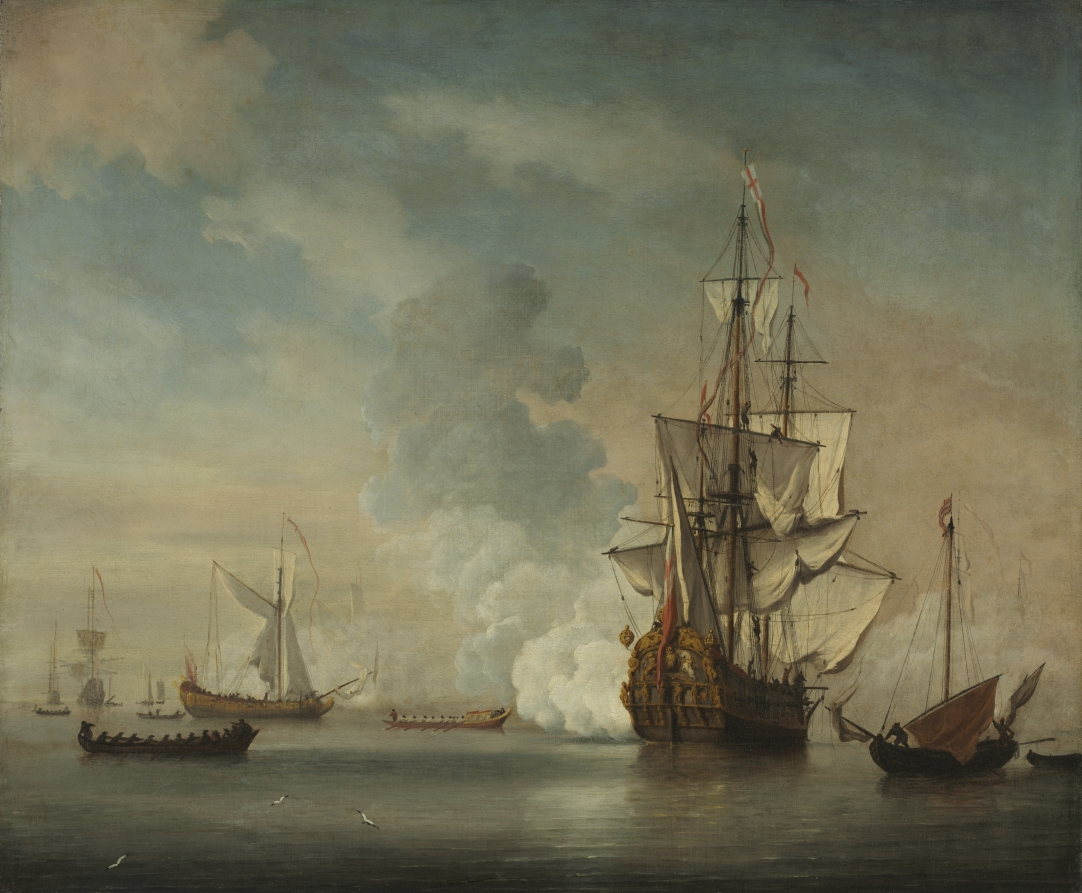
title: English Warship Firing a Salute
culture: Netherlands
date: 1690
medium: oil on canvas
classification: Painting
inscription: Front, lower center near edge, signed and dated in paint Reverse: top stretcher, stencil "360 V"; hand written in pencil "Left"; hand written in pencil (red) "18"; Vertical center bar: Label with hand written pencil "K.L Patterson"; hand written pencil " #5"; Signed lower center: "W. V. Velde J. 1690"; horizontal center bar: hand written w/grease pencil "10120".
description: Van de Velde and his father picked up their lives in Amsterdam in 1672 and moved to England to paint for the king. Their paintings of the Royal Navy’s massive ships celebrated England’s power in war and trade.